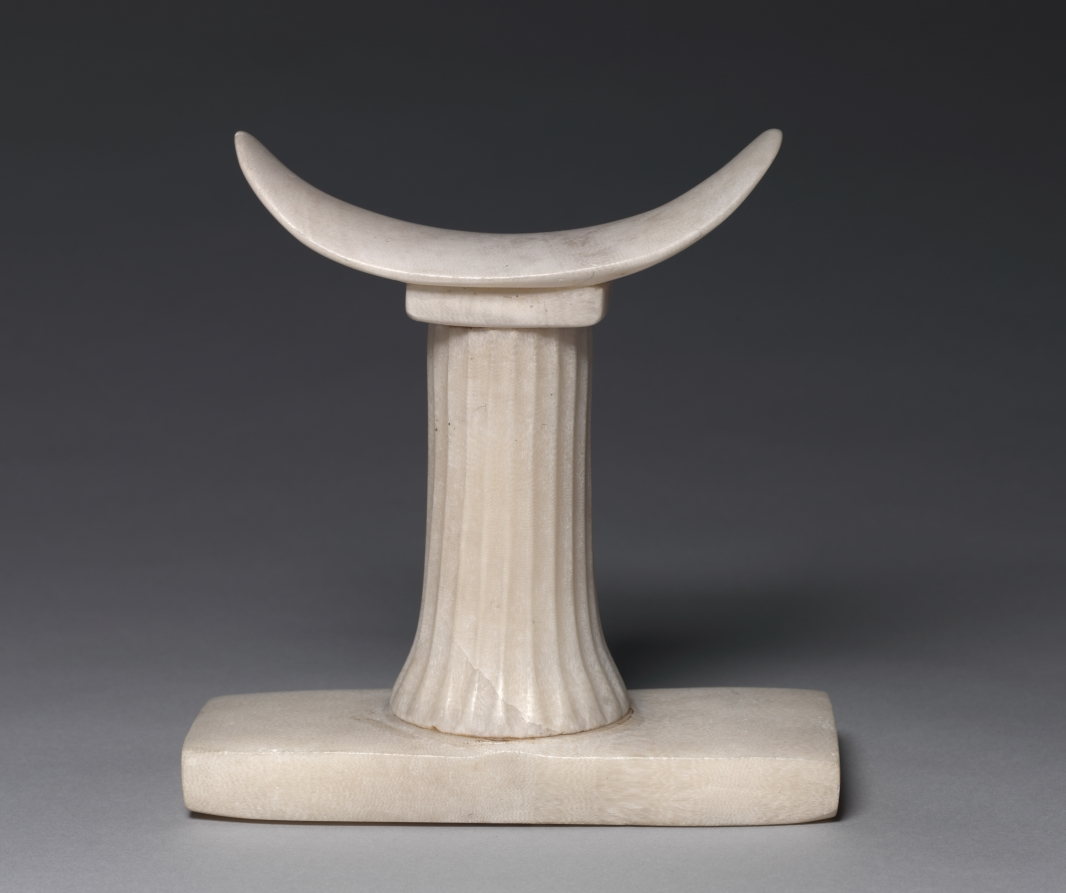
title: Headrest of Irut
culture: Egypt, Old Kingdom (2647–2124 BCE), Dynasties 5–6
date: c. 2454–2140 BCE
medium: travertine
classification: Funerary Equipment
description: The ancient Egyptians used wooden headrests as pillows. Stone headrests were replicas made for the tomb. This example is inscribed on the top of the supporting column for "the king’s noblewoman, Irut."